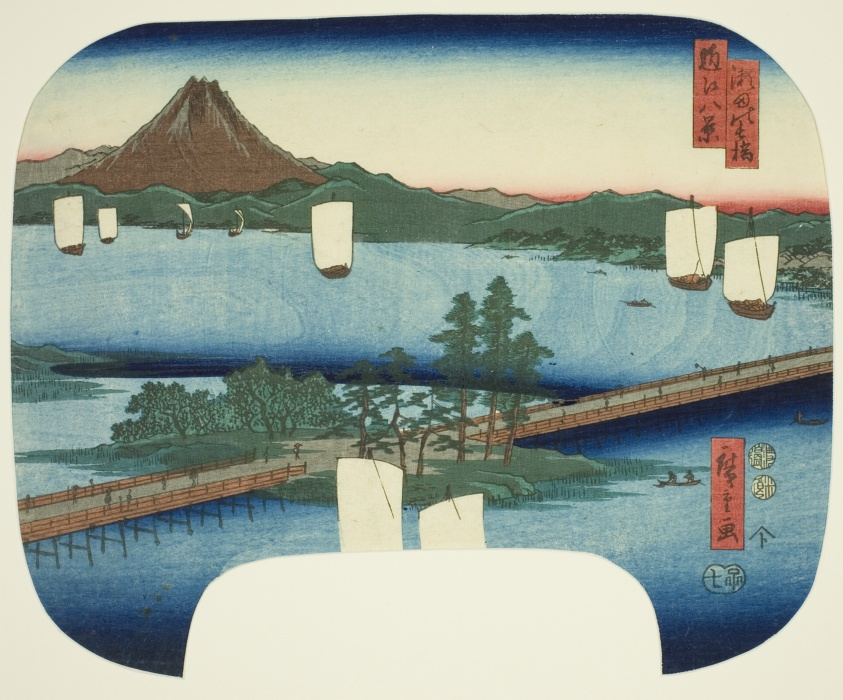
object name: Print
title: Long Bridge at Seta (Seta no nagahashi), from the series "Eight Views of Omi (Omi hakkei)"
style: Japanese (culture or style)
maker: Utagawa Hiroshige 歌川 広重; Japanese, 1797-1858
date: 1852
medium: Color woodblock print; uchiwa-e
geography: Japan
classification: woodblock print; print; asian art